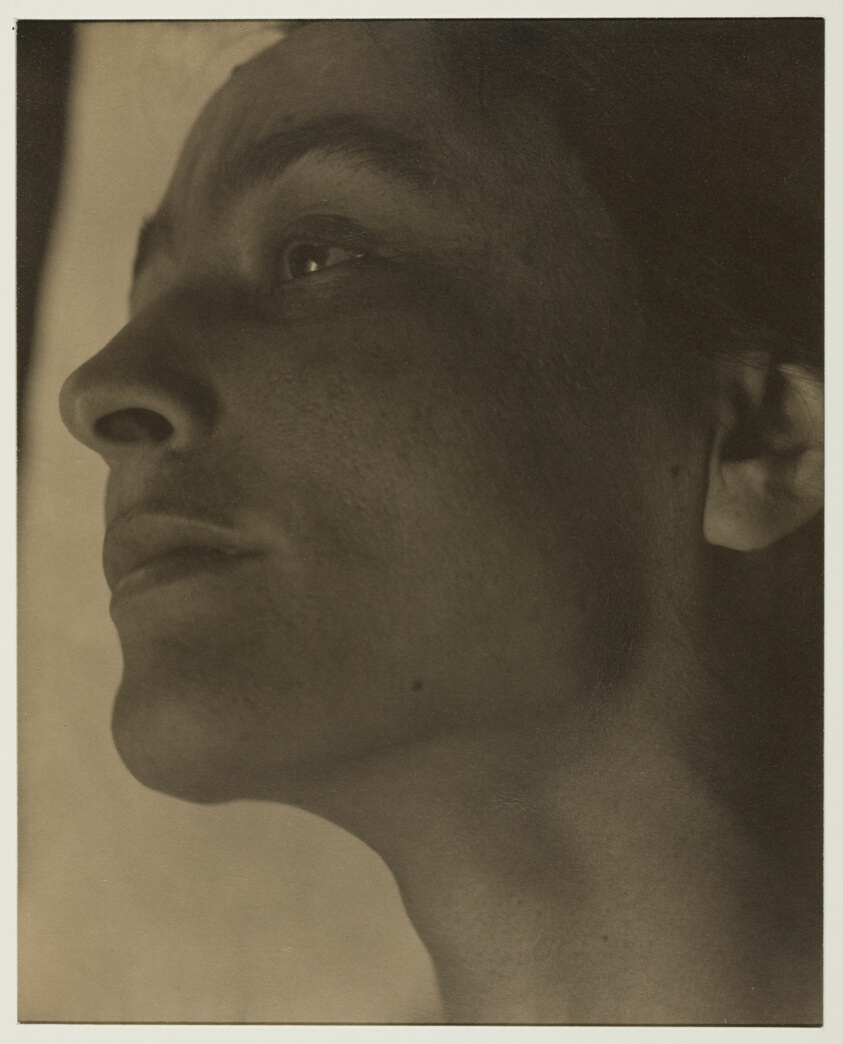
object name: Photograph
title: Georgia O'Keeffe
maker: Alfred Stieglitz (American, 1864–1946)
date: 1922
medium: Palladium print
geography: United States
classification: palladium print; photographic process; photography; photograph